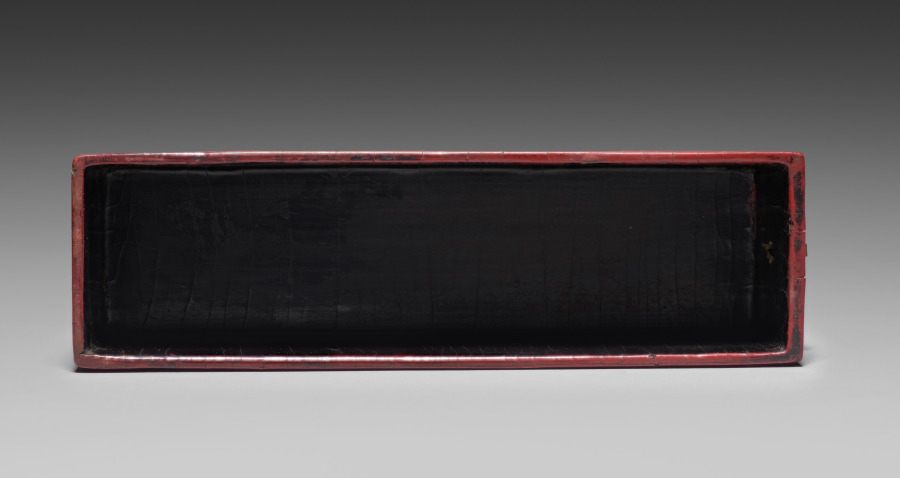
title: Drawer for a Tihong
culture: China, Ming dynasty (1368-1644), Wanli reign (1572-1620)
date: 1585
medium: carved cinnabar lacquer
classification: Lacquer